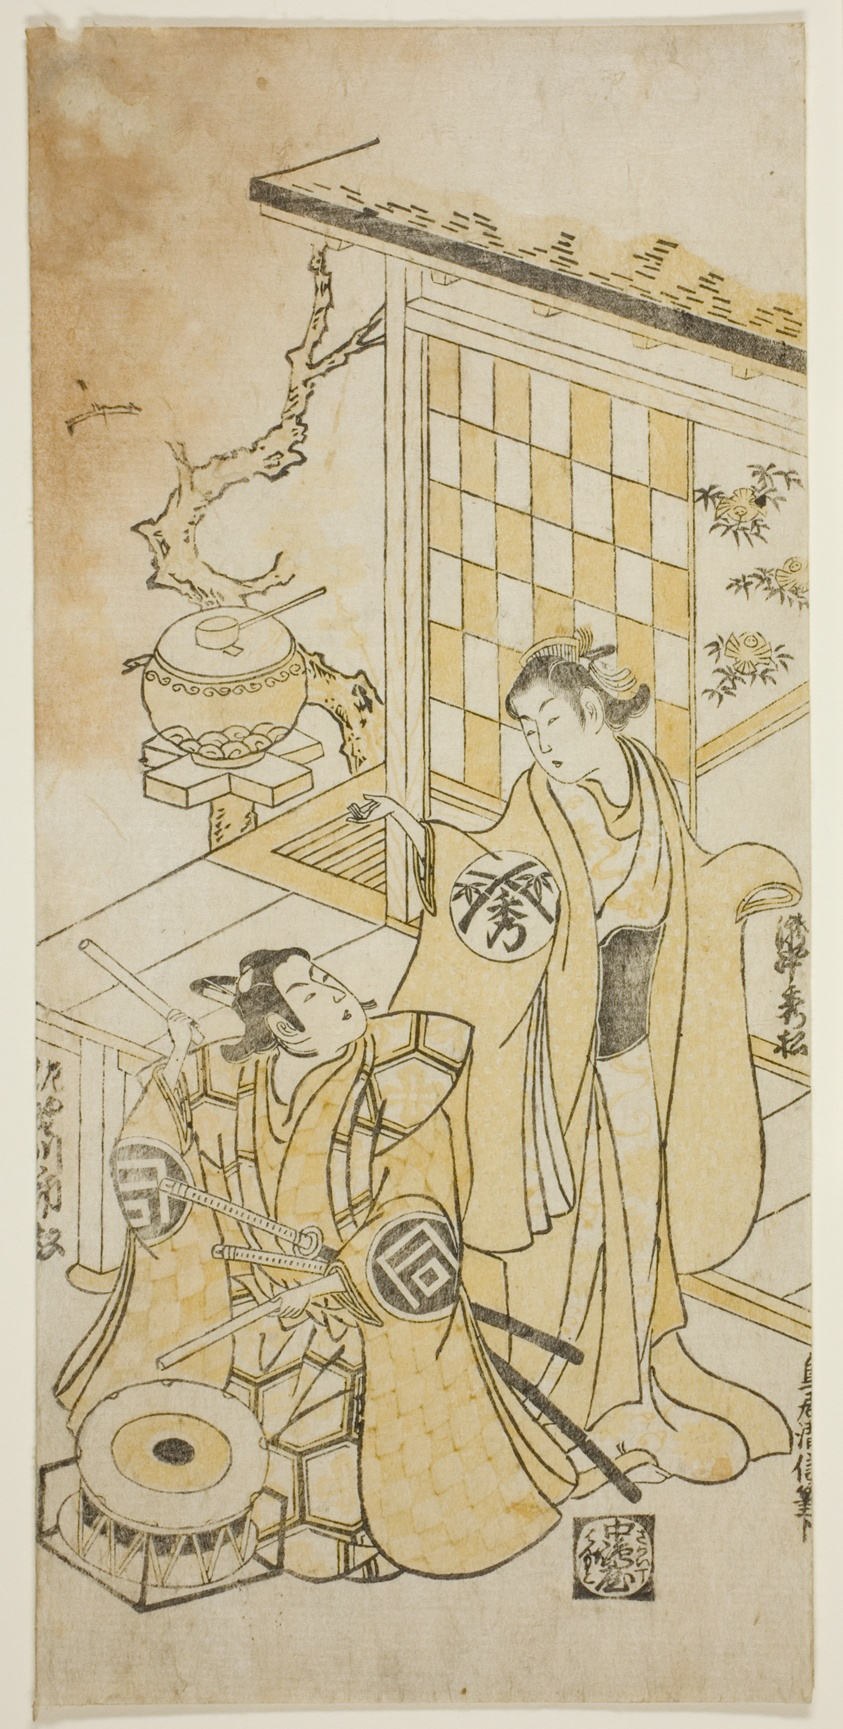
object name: Print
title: The Actors Takinaka Hidematsu I and Sanogawa Ichimatsu I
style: Japanese (culture or style)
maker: Torii Kiyonobu II (Japanese, active c. 1725-61)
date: c. 1745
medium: Color woodblock print; hosoban, benizuri-e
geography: Japan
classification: woodblock print; print; asian art